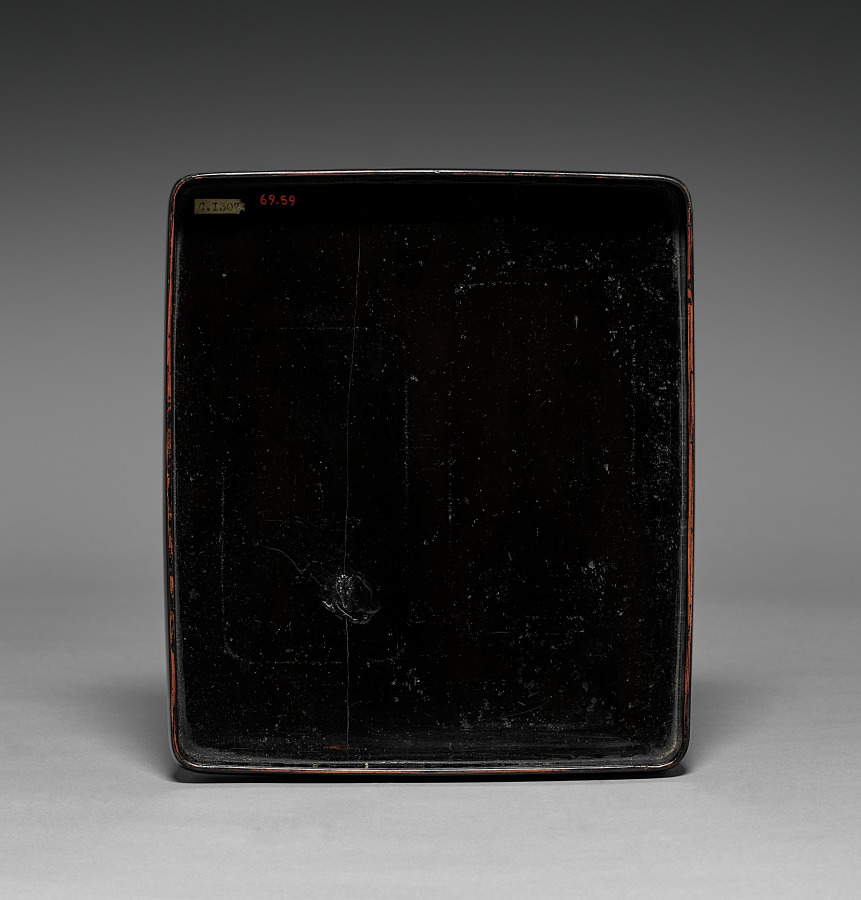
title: Writing Box (Suzuribako) with Europeans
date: 1800s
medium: lacquered wood with gold maki-e, silver inlay, and red lacquer on black ground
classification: Lacquer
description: For many Japanese patrons, objects decorated with images of foreigners offered the rare opportunity to see westerners. The two men on the left were likely Portuguese traders, identifiable by their balloon-shaped pants. The man on the right is a Jesuit priest. Portuguese traders arrived in Japan in 1543 and soon after Christian missionaries began to create outposts there. By the early 17th century, Christianity was outlawed and the Portuguese were forced out of Japan. This object was created during the short period when the Portuguese were allowed in Japan.